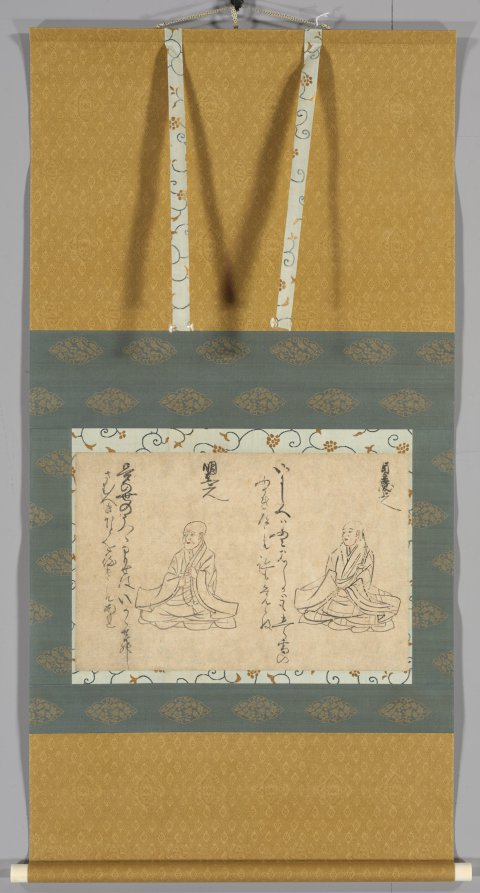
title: Thirty-Six Poetic Immortals of the Buddhist Clergy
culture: Japan, Muromachi period (1392–1573)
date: late 1300s–1400s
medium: Fragment of a handscroll remounted as a hanging scroll; ink and slight color on paper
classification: Painting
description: Handscrolls depicting eminent poets and their poems is a classic Japanese painting genre. This fragment is the end of a scroll, the beginning of which survives in the Tokyo National Museum. It has a preface stating it is based on a selection of 36 monks paired with their waka (31-syllable poems) made by Eikai (1278–1347) from Kashūji temple in the year of his death. These two portraits are of Jōkei (1155–1212) and Myōe (1173–1232), to the right and left, respectively.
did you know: The monk Myōe kept a diary of his dreams that survives in fragments today.